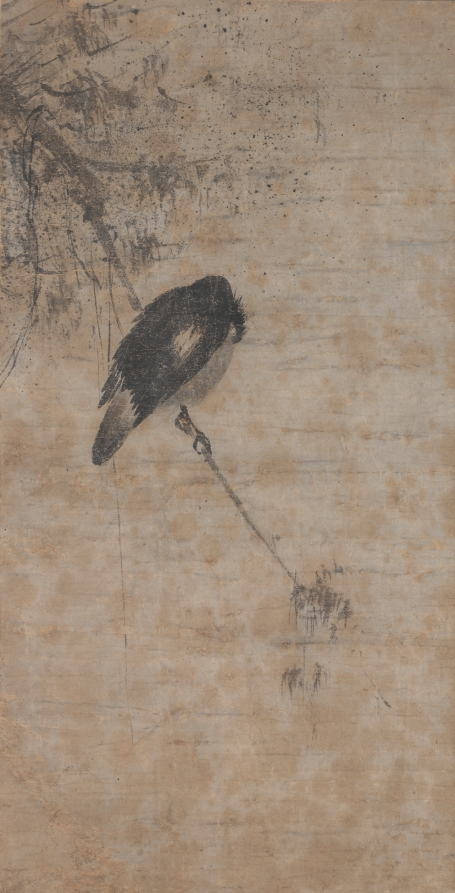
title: Willow and Magpie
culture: China, Southern Song dynasty (1127–1279)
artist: attributed to Fachang Muqi (Chinese, 1220–1280)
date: mid-1200s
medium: hanging scroll; ink on paper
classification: Painting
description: The Willow and Magpie is the product of a mindset that combines knowledgeable observation of birds in general and magpies in particular with an image-making process using a sophisticated ink technique to suggest the nature of the bird, the general characteristics of willow, and the visual effect of rain and mist. These are not trivial accomplishments but of equal importance with Southern Song period achievements in lyrical poetry or canal building.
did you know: This precious hanging scroll is stored in an elaborate inner box of lacquer with raised gold lacquer inscription on lid and silver loops on sides with lavish woven orange cords; its outer box has an amber color with woven tie.